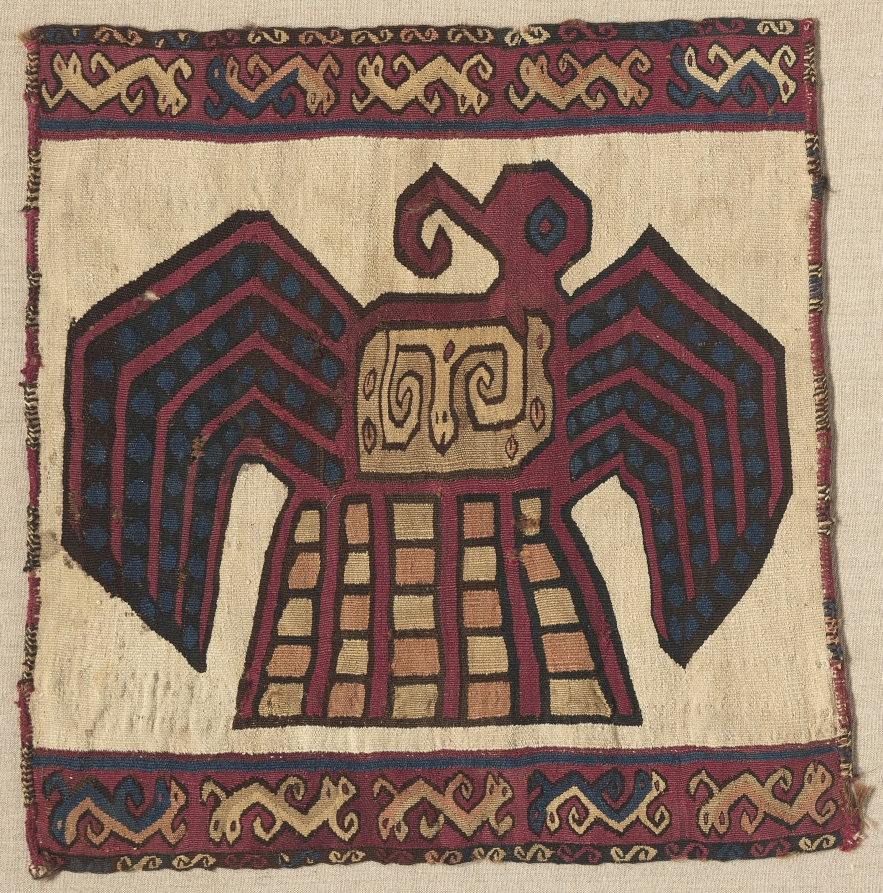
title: Tapestry Square Panel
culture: Peru, South Coast, Wari Culture, Middle Horizon, 8th-12th Century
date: c. 700–1100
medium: tapestry with interlocked wefts: wool and cotton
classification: Tapestry